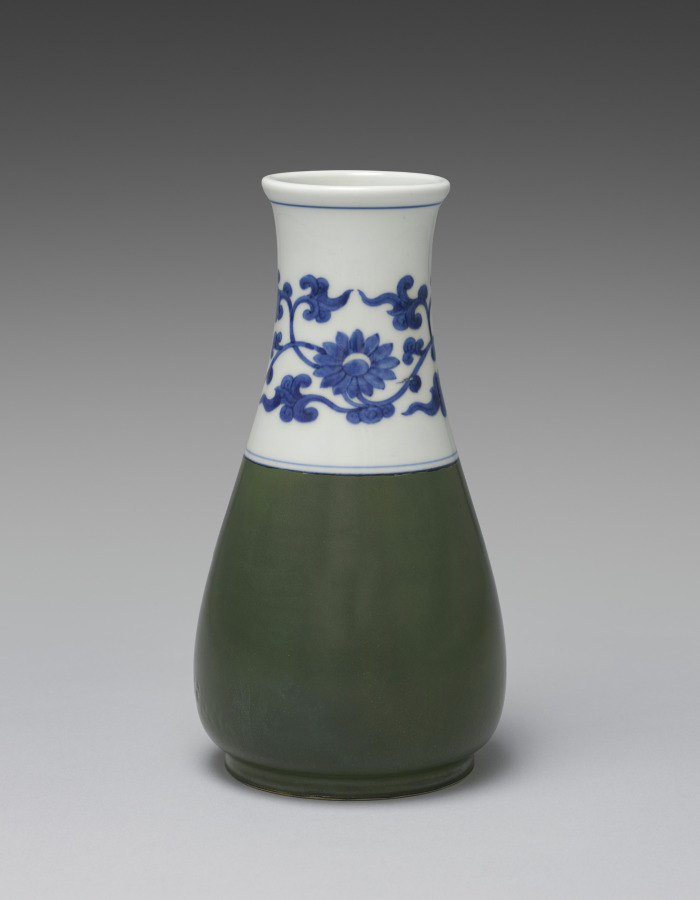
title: Flower Vase with Floral Scroll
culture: Japan, Meiji period (1868–1912)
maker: Seifū Yohei III (Japanese, 1851–1914)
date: 1893–1914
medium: Porcelain with underglaze colors and green glaze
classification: Ceramic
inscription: 清風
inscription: 帝室技芸員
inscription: 金聲玉振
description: The upper part of this vase is painted in underglaze blue with a floral scroll of leaves accentuated with a single chrysanthemum motif on each face and bound at top and bottom with single blue lines. The box lid for the vase is short on detail; the inscription notes only that it is a flower vase with underglaze blue. It is possible that the box is a mismatch because the inscription does not mention the vase’s more distinctive feature: the deep green glaze on its lower half, which is seen much less frequently among Yohei III’s works. This glaze may be an example of a dark green porcelain glaze called rōkanji, which the artist invented in 1892. The name of the glaze comes from Chinese, in which it is pronounced langgan. It may literally mean “tinkling sound of jade” and could refer to malachite, among other proposed identifications.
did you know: The center of each chrysanthemum has a crescent-shaped design at the top filled with a very pale yellow wash under the transparent glaze.